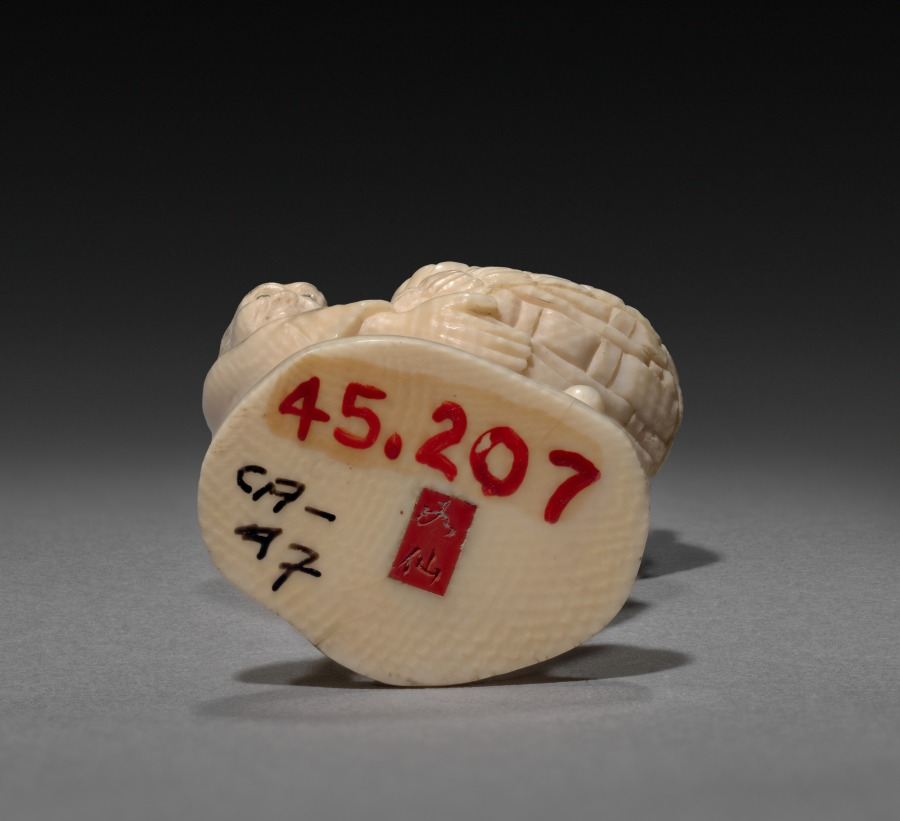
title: Man Carrying a Basket of Fish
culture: Japan, Meiji period (1868–1912)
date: early 1900s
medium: ivory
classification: Ivory